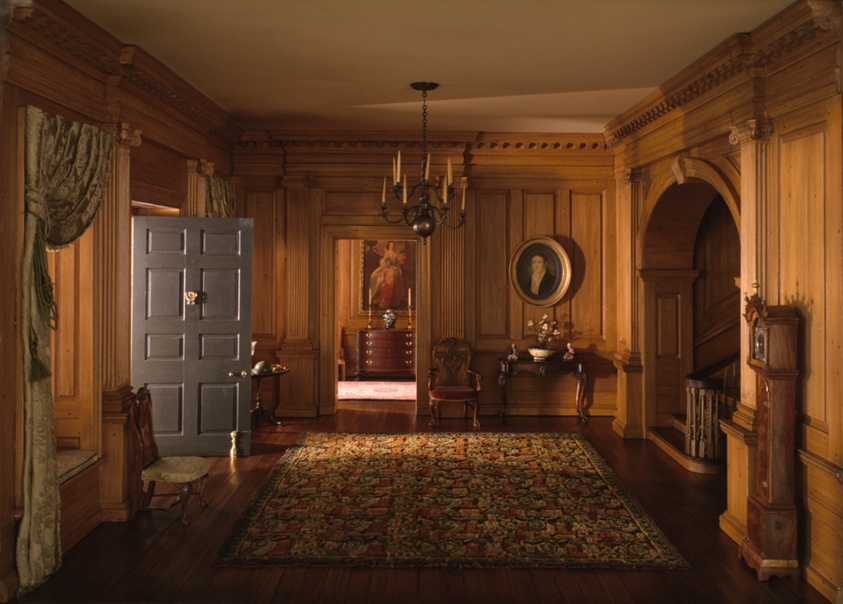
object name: Miniature room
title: A24: Virginia Entrance Hall, 1751-55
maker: Designed by Narcissa Niblack Thorne; American, 1882-1966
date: c. 1940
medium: Miniature room, mixed media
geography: United States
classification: miniature; thorne rooms